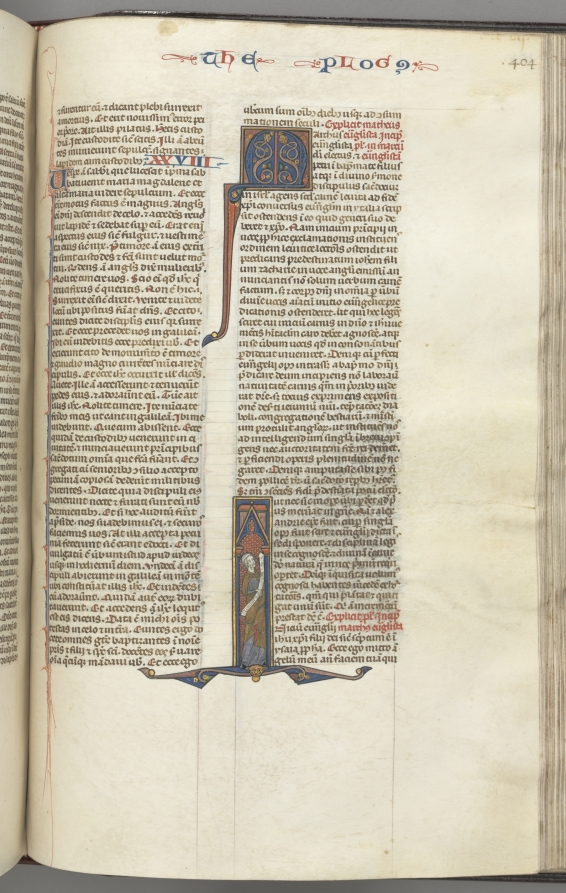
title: Fol. 404r, Mark, historiated initial I, Mark standing with a scroll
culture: Southern France, Toulouse(?), 13th century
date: c. 1275–1300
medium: ink, tempera and gold on vellum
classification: Bound Volume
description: Biblical manuscripts were highly prized and important possessions of churches, monasteries, cathedral schools, and universities throughout medieval Europe. The biblical texts were known as the vulgate, the translations made by Saint Jerome in the fourth century from Hebrew and Greek into Latin, which became the definitive and official Latin version of the Roman Church. In the 13th century, the bible was, for the first time, produced as a single volume with an officially sanctioned sequence to its books and chapters as illustrated by this example. The very extensive decoration of this bible is arranged hierarchically to indicate the relative importance of the various texts so that full or almost full-page initials mark the openings of the first prologue, Genesis, and the first Gospel; historiated initials mark the beginning of each book and illuminated initials mark the Prologues.